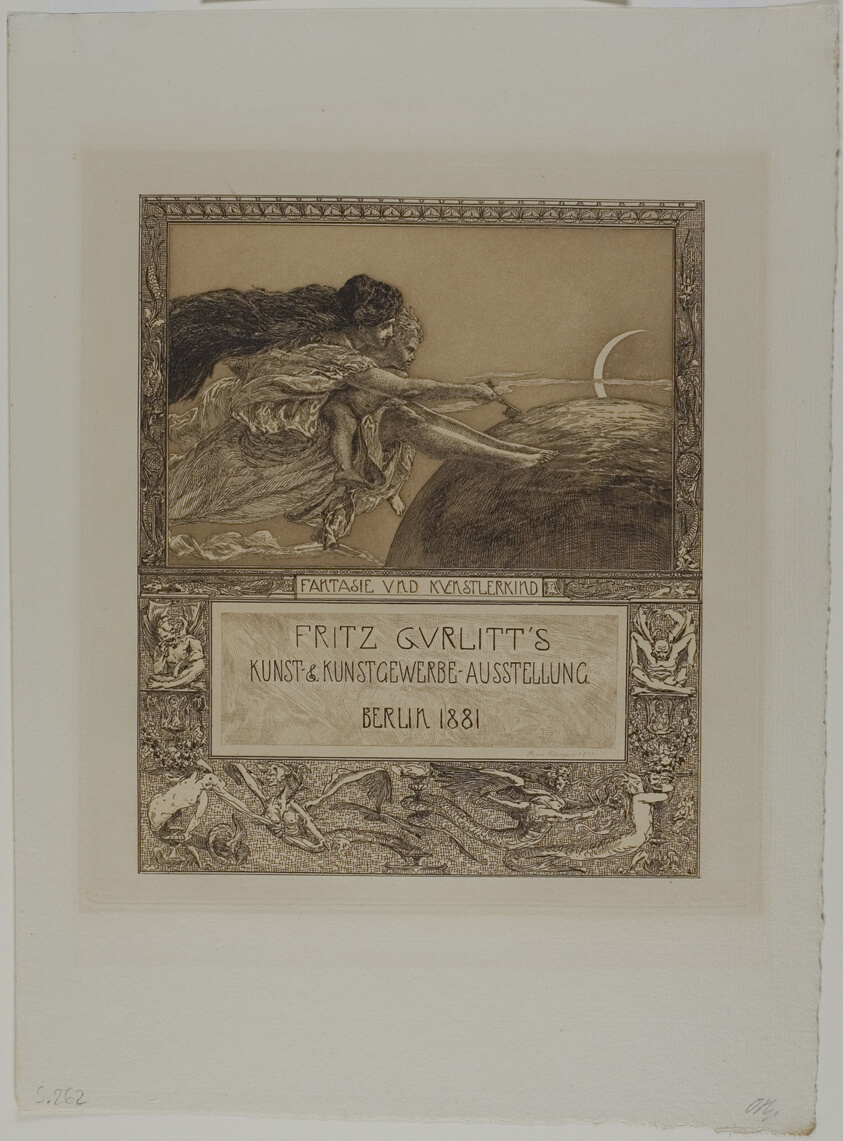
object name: Print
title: Card for the Gurlitt Exhibition: Imagination and the Child Artist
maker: Max Klinger (German, 1857-1920)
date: 1881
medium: Etching and aquatint on ivory laid paper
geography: Germany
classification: etching; print; prints and drawing